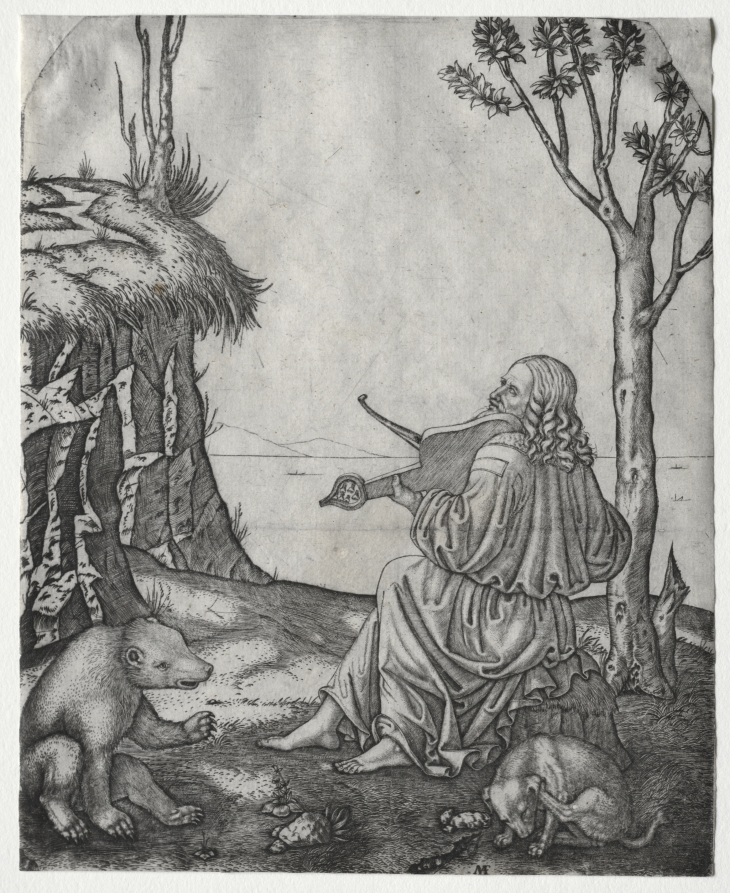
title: Orpheus Charming the Animals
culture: Italy, 16th century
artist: Marcantonio Raimondi (Italian, 1470/82–1527/34)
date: c. 1505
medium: engraving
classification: Print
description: In Greek mythology, Orpheus was a singer and poet. He was given a lyre by Apollo, the god of music, and was taught to play by the Muses. His songs, melodiously accompanied by his instrument, were so beautiful that they pacified wild animals, calmed the seas, and animated trees and rocks. Here, a subdued bear is depicted in close proximity to a dog, and stones have gathered at the musician’s feet. The instrument depicted here is a lira da braccio, an instrument played by Leonardo da Vinci at the time when this engraving was made.